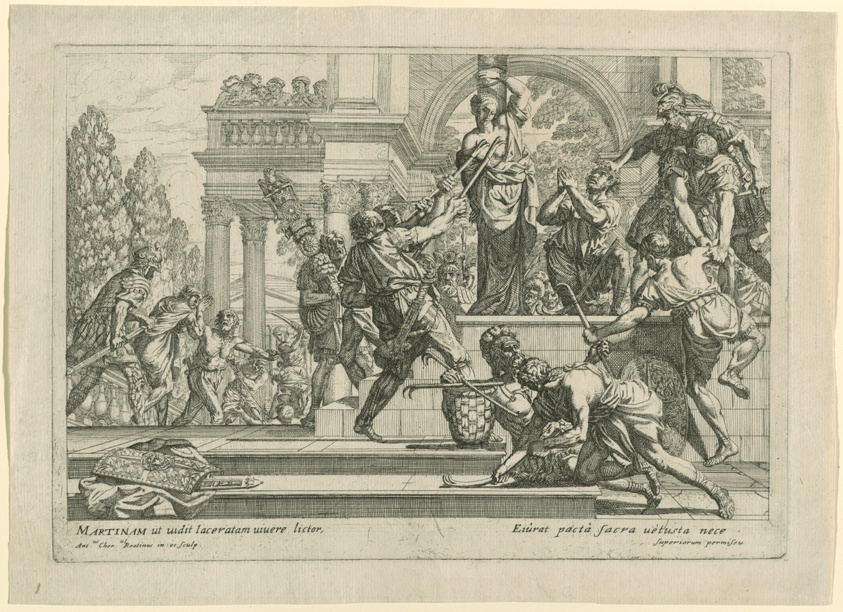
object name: Print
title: Martyrdom of Saint Martina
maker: Antonio Gherardi; Italian, 1644-1702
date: c. 1665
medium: Etching on cream laid paper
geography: Italy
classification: etching; print; prints and drawing